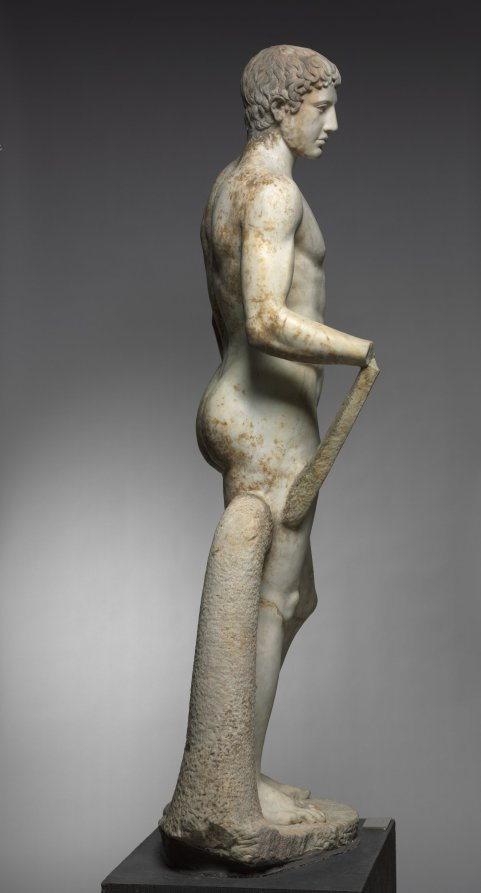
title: Statue of an Athlete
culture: Italy, Roman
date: 1–100 CE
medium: marble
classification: Sculpture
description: This idealized athlete recalls Greek sculptural types invented and popularized during the 400s BC. Large-scale athletes and other sculptures like this were originally created by famous artists as sanctuary dedications. Centuries later, they were widely copied and adapted by Roman sculptors, whose clients sought their own versions of earlier masterpieces. Working in marble rather than bronze, these sculptors added certain elements for stability, such as the struts and the large tree trunk beside the right leg here. Sculptures like this one are profoundly complex, made by and for Romans but descended from Greek ancestors.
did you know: For many years, this sculpture stood in the rotunda of the Cleveland Museum of Art.